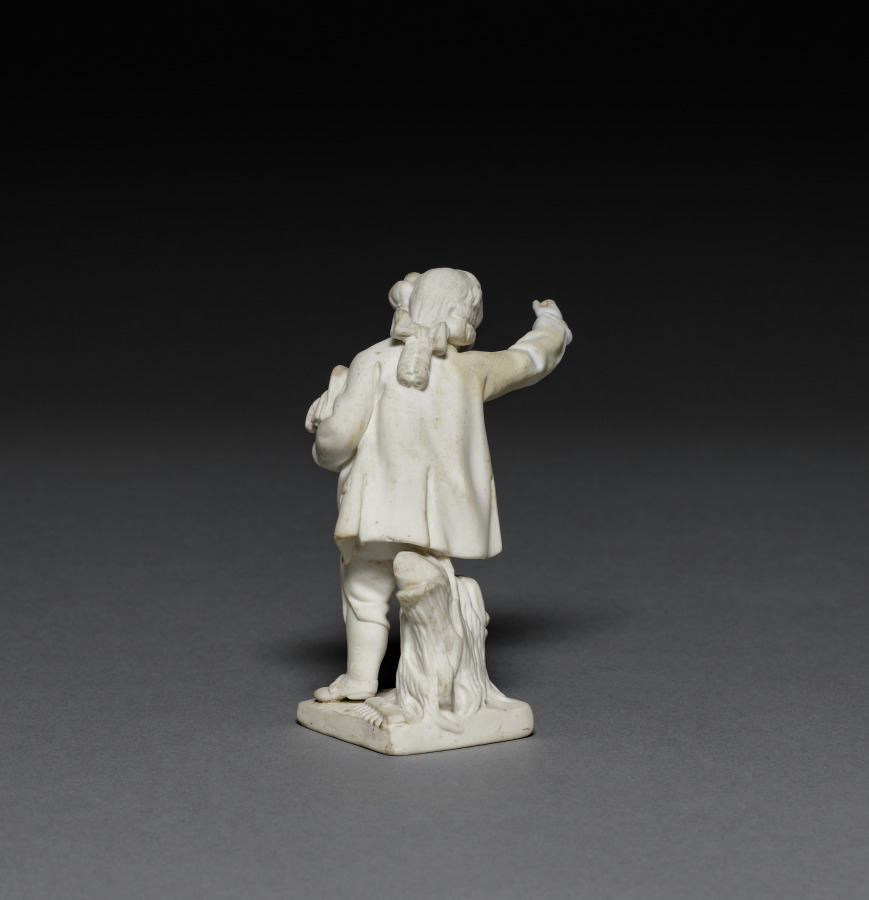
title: Figure of a Bird Charmer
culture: France, Sèvres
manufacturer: Sèvres Porcelain Factory (French, est. 1756)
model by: Etienne-Maurice Falconet (French, 1716–1791)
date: 1764–66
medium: Unglazed soft-paste porcelain (biscuit)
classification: Ceramic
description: Designs for 17 young children involved in various activities were issued by sculptor Étienne-Maurice Falconet and regularly reproduced as porcelain figurines. This figure, who stretches out his hand in anticipation that a bird might land, would have been modeled after one of these designs. Decorative figurines like these were often included in elaborate dining services to be placed about a table along with the usual tureens and tableware.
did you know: 31 figures modeled after Falconet’s series were included in the dinner service given by French King Louis XV to Christian VII, King of Denmark in 1768.